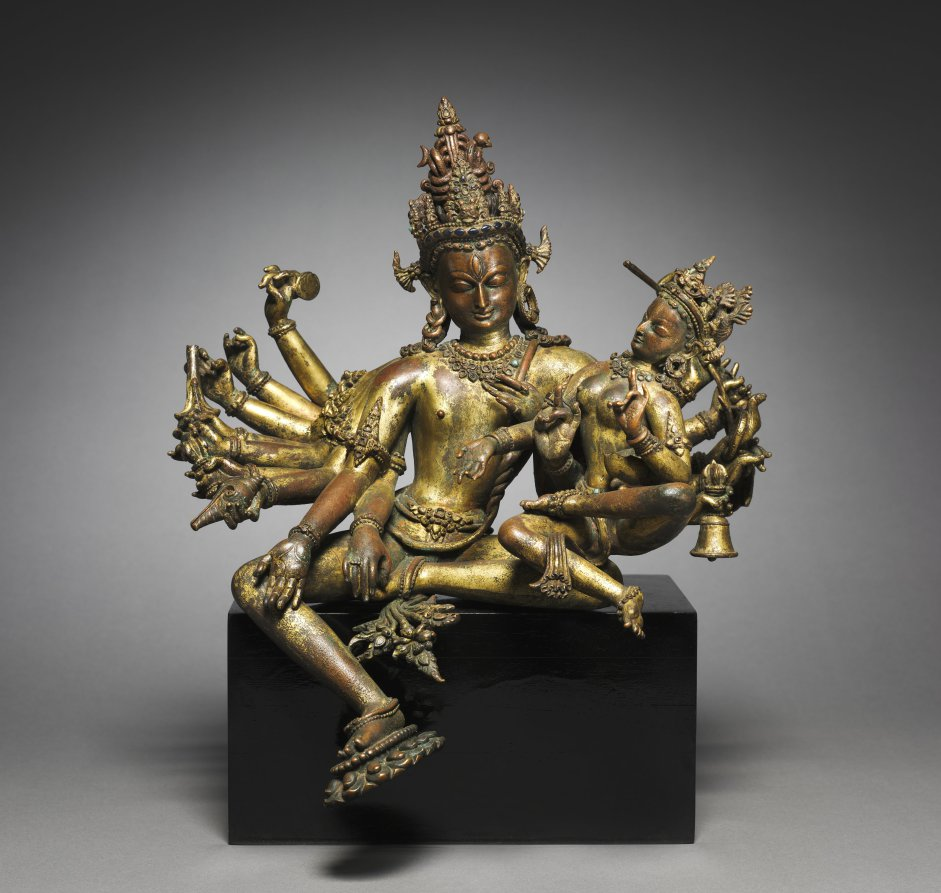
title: Kubjika–Navatman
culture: Nepal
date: 1300s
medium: Gilt bronze with semiprecious stones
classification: Sculpture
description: The tantric Hindu Goddess Kubjika sits on the bent knee of her male consort, Navatman, a form of Shiva. Tantric practitioners use the recitation of mantras, which are powerful formulas or spells, in order to achieve the favor and power of the goddess. In this sculpture, the male figure personifies the Navatman Mantra by means of which devotees can access the goddess Kubjika. Kubjika’s name translates to “the crooked one,” and she is often shown as an elderly woman with a curved back. Here, however, she is depicted as a youthful contortionist.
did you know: The smaller figure, the goddess Kubjika, is the more powerful of the pair.